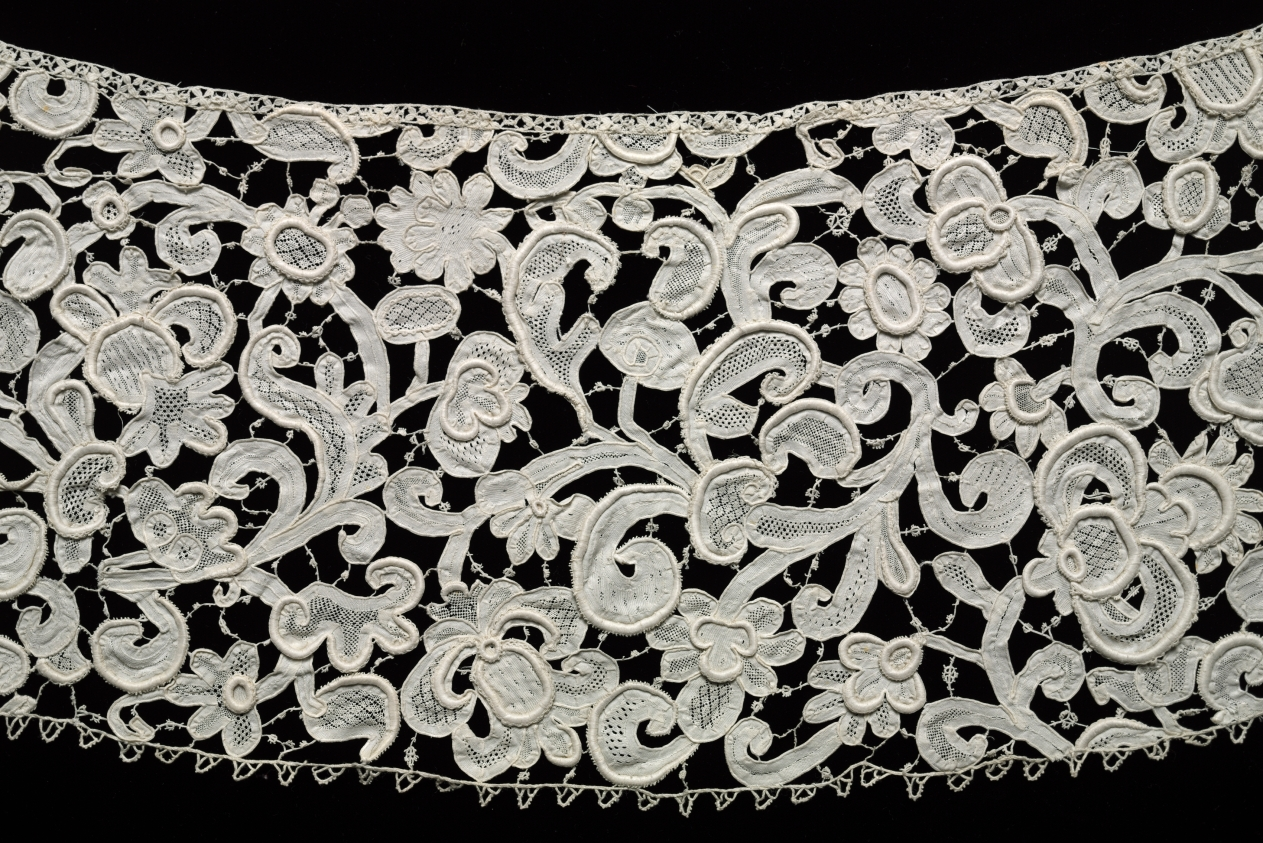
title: Lace Collar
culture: Italy, Venice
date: 1600s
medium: Linen: needle lace (Venetian raised point)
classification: Lace